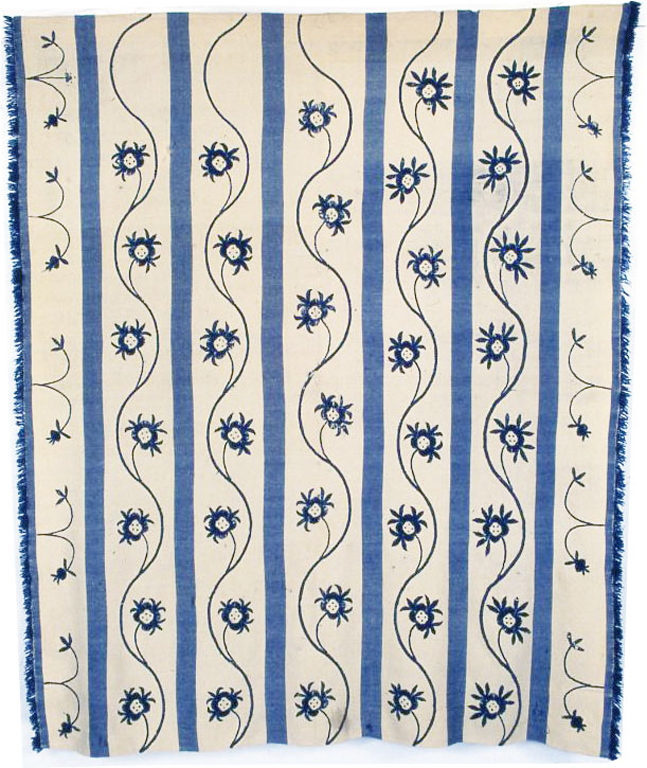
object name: Textile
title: Blanket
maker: United States, probably New York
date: c. 1830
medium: Wool, twill weave; embroidered with wool in chain, satin, and stem stitches; edged with linen and wool fringe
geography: New York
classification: textile; needlework (visual works)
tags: flowers